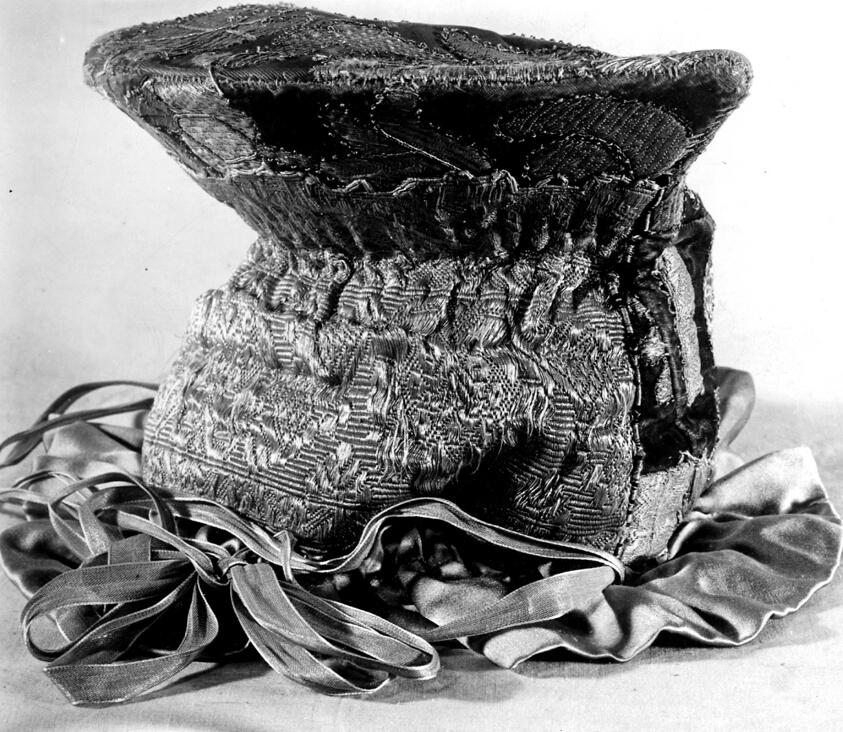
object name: Costume and Accessories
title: Headdress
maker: Russia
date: 19th century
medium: Vologda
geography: Russia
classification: textile; headdress - needlework; costume accessory - headdress; costume accessory; costume; dress (garment); clothing